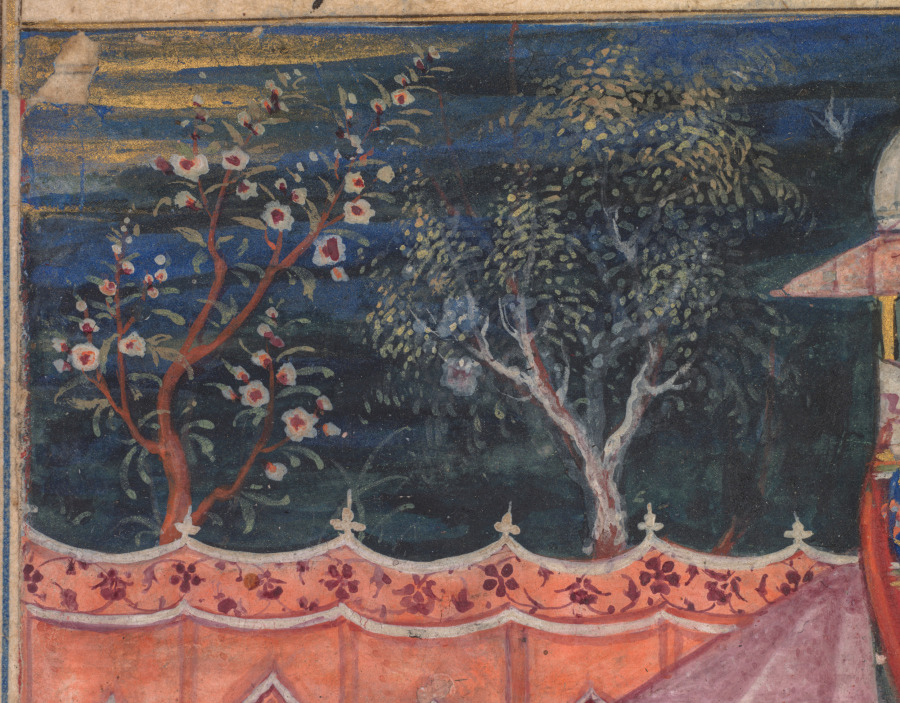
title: The monkey slain, his blood to be used as medicine for the ailing prince he has bitten, from a Tuti-nama (Tales of a Parrot): Fifth Night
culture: Mughal India, court of Akbar (reigned 1556–1605)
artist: Basawan​ (Indian, active mid-1500s)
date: c. 1560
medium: gum tempera, ink, and gold on paper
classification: Painting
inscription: 'amal basāwan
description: Wounded by the chess-playing monkey’s bite, the prince’s hand became increasingly infected. The only cure, his doctors said, was to apply the blood of the monkey to the wound and let it dry. Reluctantly, the prince allowed the monkey to be killed. Two men accomplish this serious work at the left. In the right margin is written the name of the artist, the celebrated Basavana. The Tuti-nama contains the earliest known paintings by the prolific master who was instrumental in shaping the Mughal painting style over subsequent decades.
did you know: Under the covers is the hand that got infected from the monkey bite.